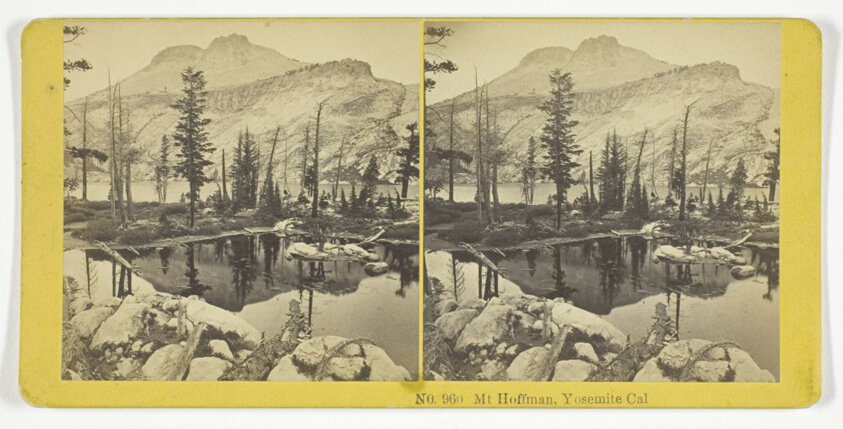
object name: Photograph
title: Mt. Hoffman, Yosemite, Cal.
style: 19th century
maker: Kilburn Brothers (American, active 1855–1875)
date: 1855/75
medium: Albumen print, stereo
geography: United States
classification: stereograph (albumen); albumen silver print; photographic process; photography; photograph